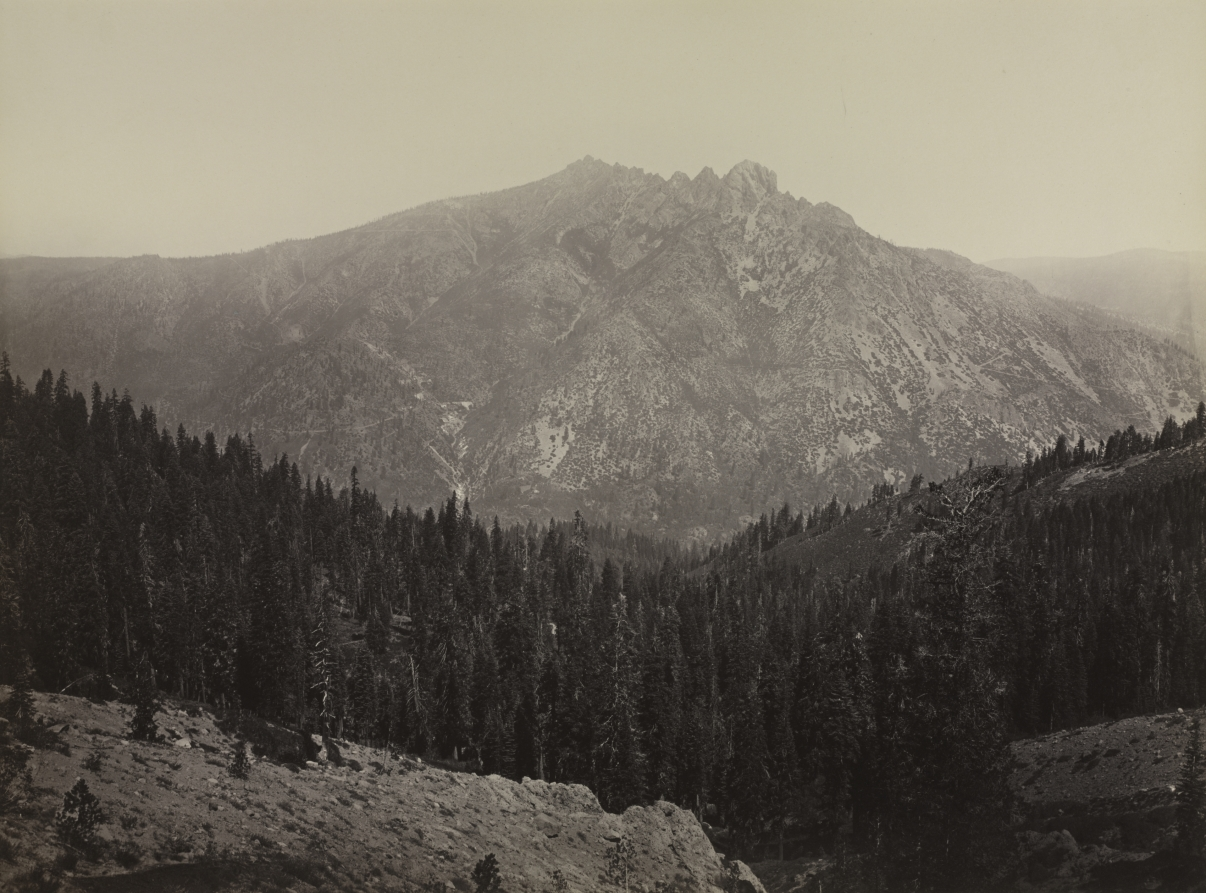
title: Davoncastle Butte, Sierra Nevada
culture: America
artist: Carleton E. Watkins (American, 1829–1916)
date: c. 1866–1870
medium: albumen print from wet collodion negative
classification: Photograph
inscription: Written in pencil on verso: "CEN1900"; "9 [circled]"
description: From the medium’s beginnings in the 1830s through the 1880s, most photographs were intimately scaled objects meant for the hand, the album, and the home. As the medium began being used to document landscapes and monuments in the 1850s, larger scale processes arose such as the glass-plate negative. The mammoth print truly seemed gargantuan in the 1860s. For much of the 20th century, the 8-x-10-inch gelatin silver print was the norm for photojournalism; these prints were destined for reproduction in books and magazines around the same scale.